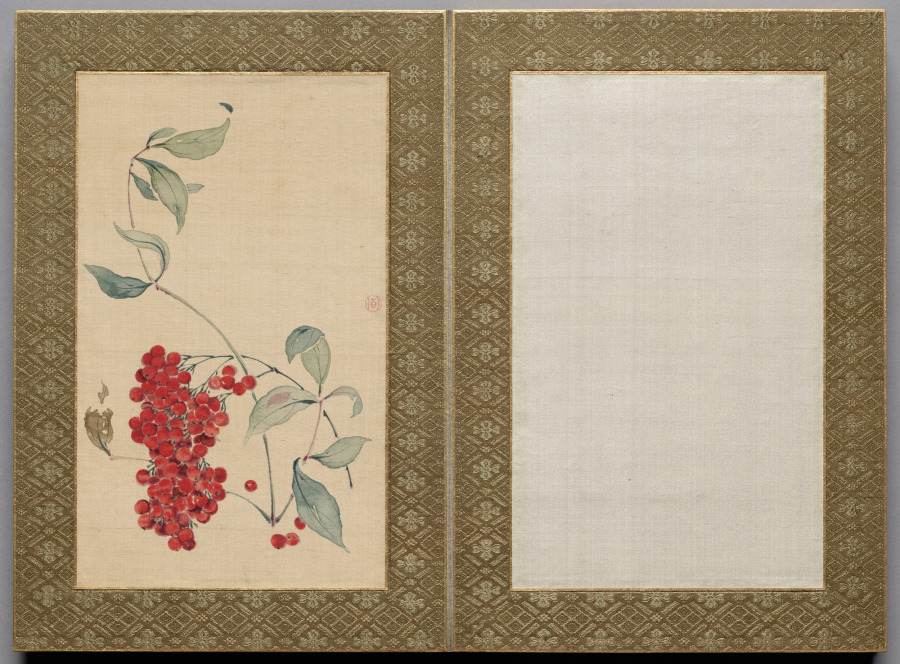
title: Painting from Flowers and Grasses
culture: Japan, Edo period (1615–1868)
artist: Tsubaki Chinzan (Japanese, 1801–1854)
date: 1841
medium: album; ink and color on silk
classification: Painting